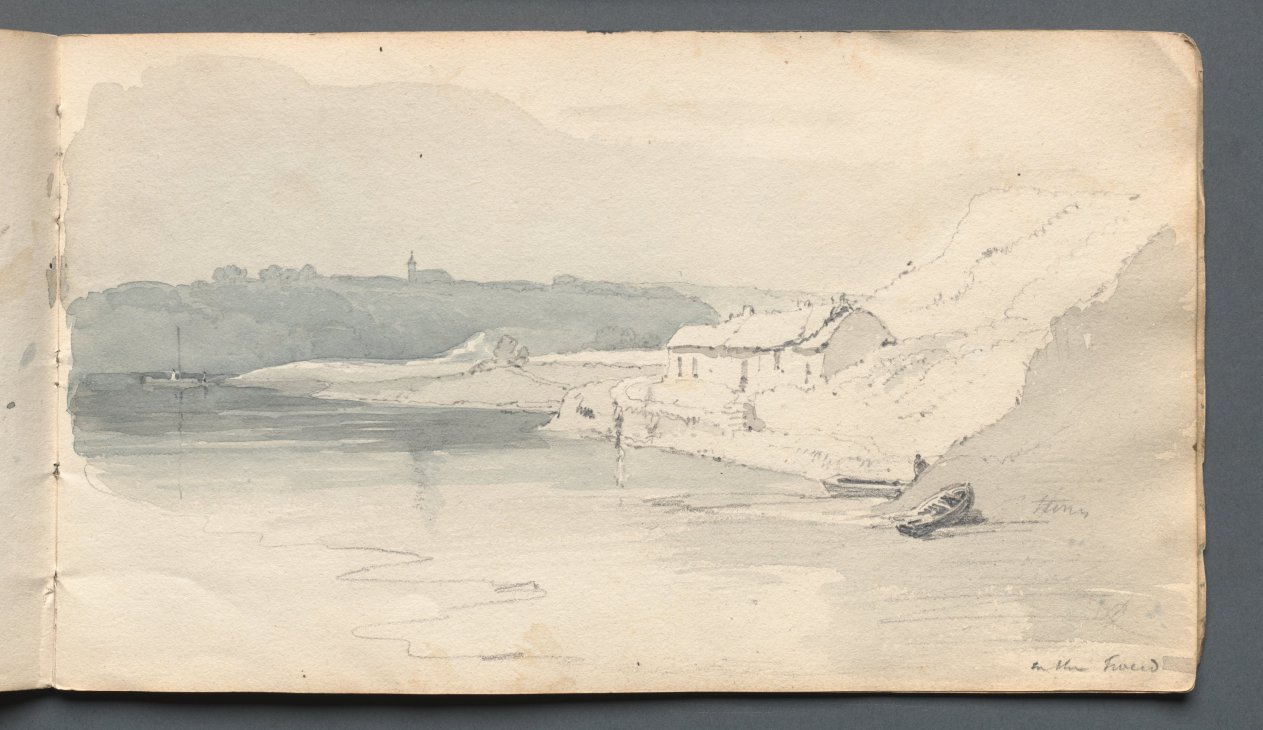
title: Sketchbook: On the ?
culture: England, 19th century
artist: Samuel Prout (British, 1783–1852)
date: 1814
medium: graphite with gray wash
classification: Bound Volume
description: John Ruskin (also in this gallery) admired Prout’s strength as a draftsman. Like the topographical watercolorists of the 18th century, Prout emphasized form over color in his watercolors, as is evident in the monochromatic, delicate English views in this sketchbook.